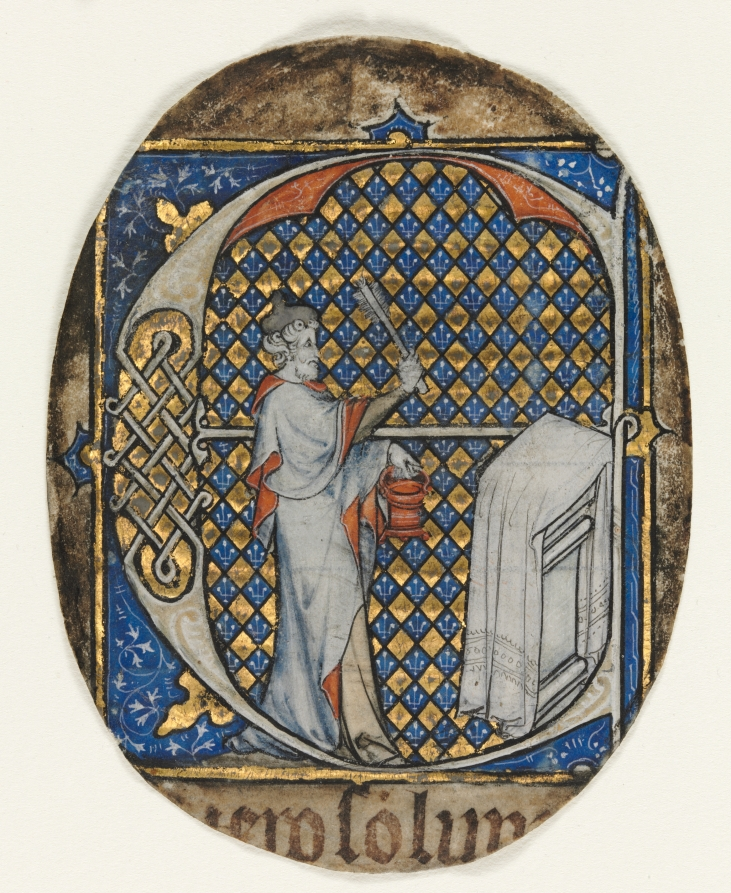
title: Fragment from a Lectern Bible: Initial E[t fecit Josias] with Josiah Aspersing the Altar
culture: France, Paris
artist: circle of Master Honoré (French, Paris, active 1288–1300)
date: c. 1300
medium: ink, tempera, and gold on vellum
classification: Manuscript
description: This initial comes from a large bible (about 23 inches high) and introduces the opening text of the Book of Esdras: Et fecit Josias in Jerosolymis Domino (When Josiah celebrated the Passover festival in Jerusalem to his Lord). The artist, a close follower of Master Honoré at Paris, set his figure against a diapered ground of alternating gold and blue diamonds with fleur-de-lys. Instead of portraying Josiah as a Jew, however, the artist abandoned historical perspective and painted him as a Christian priest sprinkling the altar with holy water in preparation for the Mass.